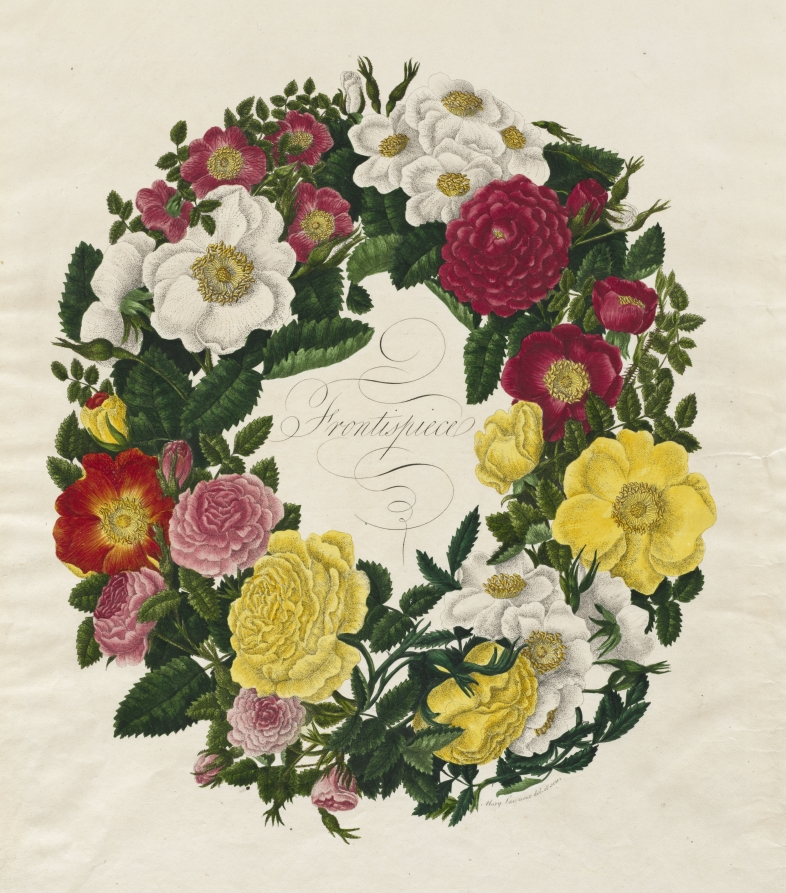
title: A Wreath of Roses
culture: England, late 18th Century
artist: Mary Lawrance (British, 1781–1845)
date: 1799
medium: etching and stipple, hand colored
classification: Print